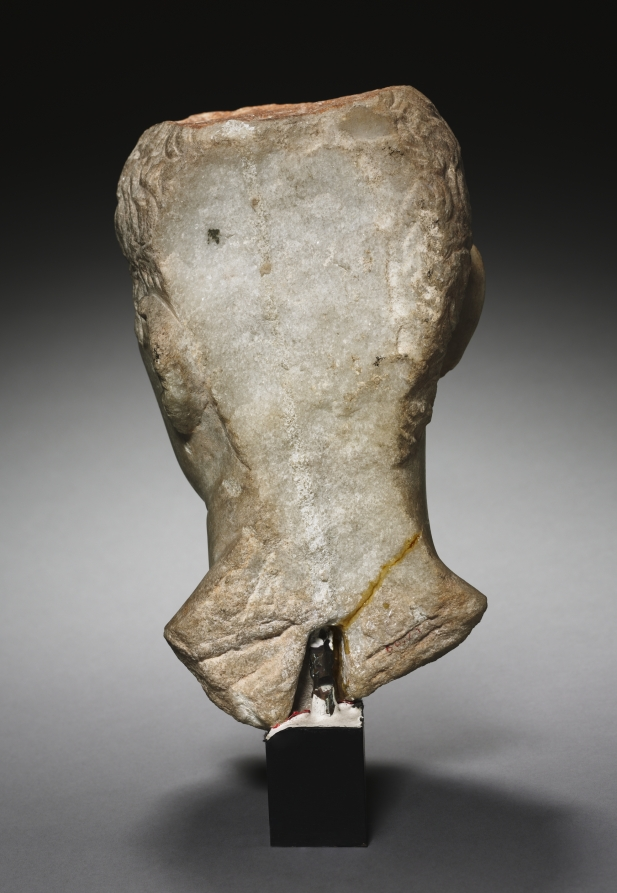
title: Portrait Head of C. Cornelius Gallus (?)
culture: Egypt, Greco-Roman period (332 BCE–395 CE), Roman empire (30 BCE–395 CE)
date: c. 30 BCE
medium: marble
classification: Sculpture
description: This highly individual portrait must have been made for a man of considerable importance. It may represent Gaius Cornelius Gallus, who lived c. 69-26 BC. After aiding Octavian in the war against Antony and Cleopatra, Gallus served as the first governor of Egypt. There he put down two rebellions, but soon fell into disgrace and exile, eventually committing suicide. The head was made to be inserted into a body, and has a flat back and top, suggesting it once wore a separately made fold of toga draped over it (in the fashion known as togatus capite velato, associated with high priests). Some scholars have suggested a later date for this portrait, perhaps in the reign of Nero or Claudius.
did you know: Traces of red paint remain, especially in the hair.